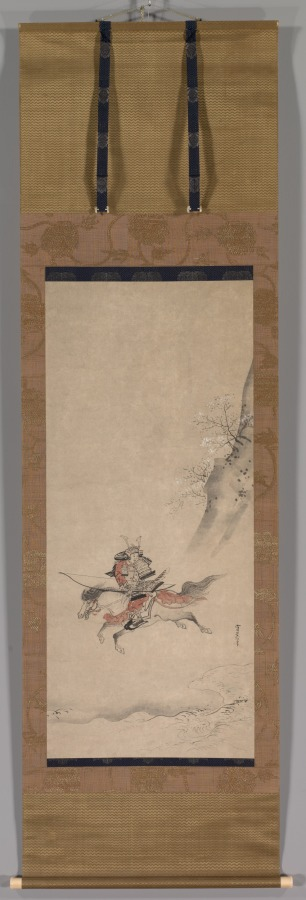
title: A Samurai on Horseback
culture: Japan, Edo period (1615–1868)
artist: Kusumi Morikage (Japanese, active c. 1620–1690)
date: mid- to late 1600s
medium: hanging scroll; ink and slight color on paper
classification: Painting